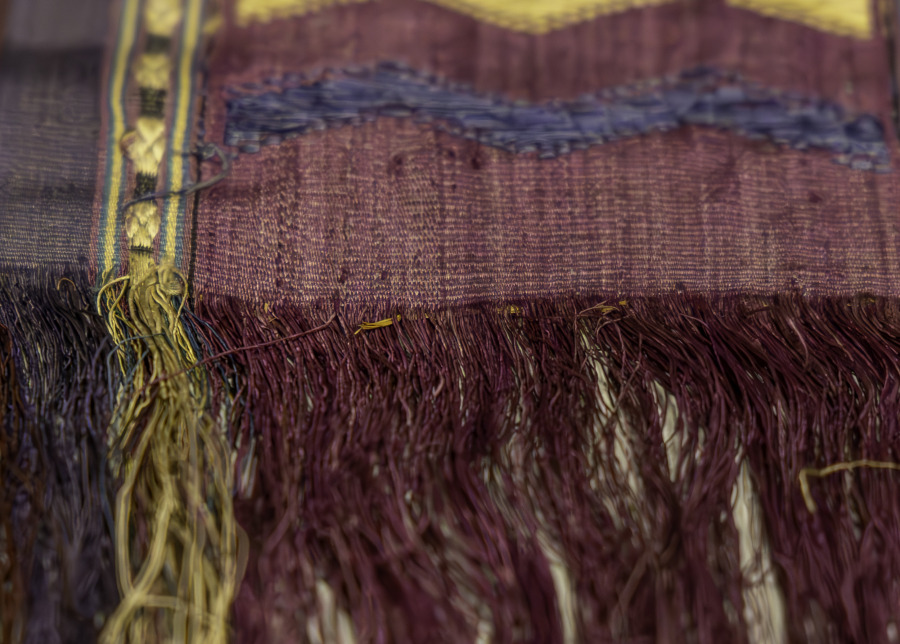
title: Wrapper (Lamba Akotifahana)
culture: Madagascar, Merina Kingdom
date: 1800s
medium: Silk (Bombyx mori)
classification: Textile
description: A lamba is an untailored textile worn by all ages, classes, and genders across much of Madagascar. The lamba akotifahana takes its name from the weft-float motifs (akotifahana) that adorn it. Weavers added extra weft (horizontal) threads to make them. Representing the final production of lamba akotifahana during the Merina Kingdom before French colonization (1897), this example is densely covered with motifs.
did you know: The motifs on this weaving are not symbolic; the weaver chose them for aesthetic reasons.